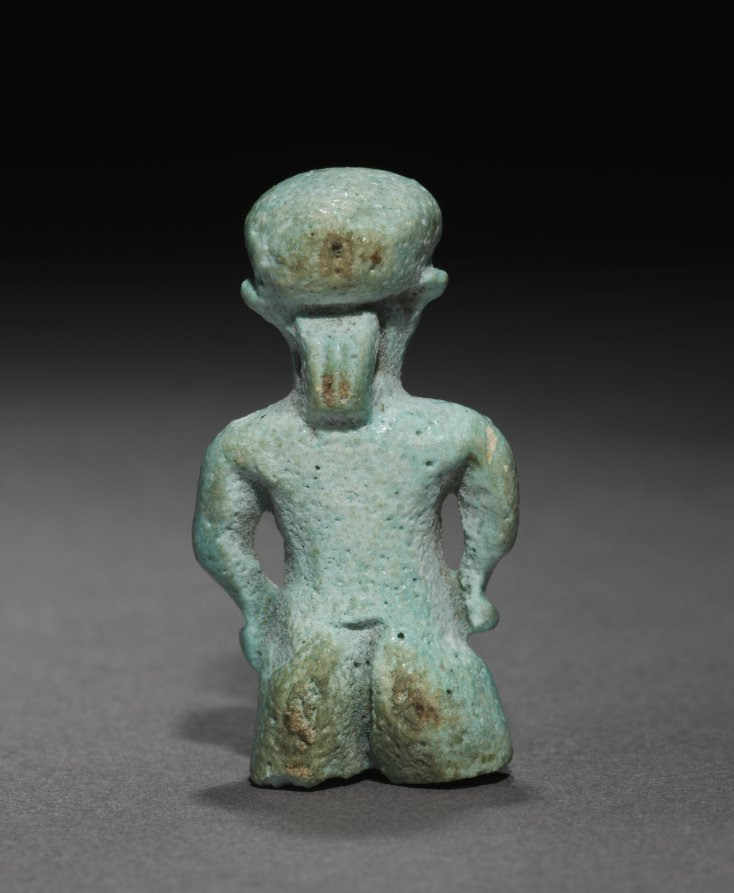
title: Amulet of Pataikos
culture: Egypt, Greco-Roman period (332 BCE–395 CE), Ptolemaic dynasty (305–30 BCE)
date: 305–30 BCE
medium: pale blue faience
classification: Amulets